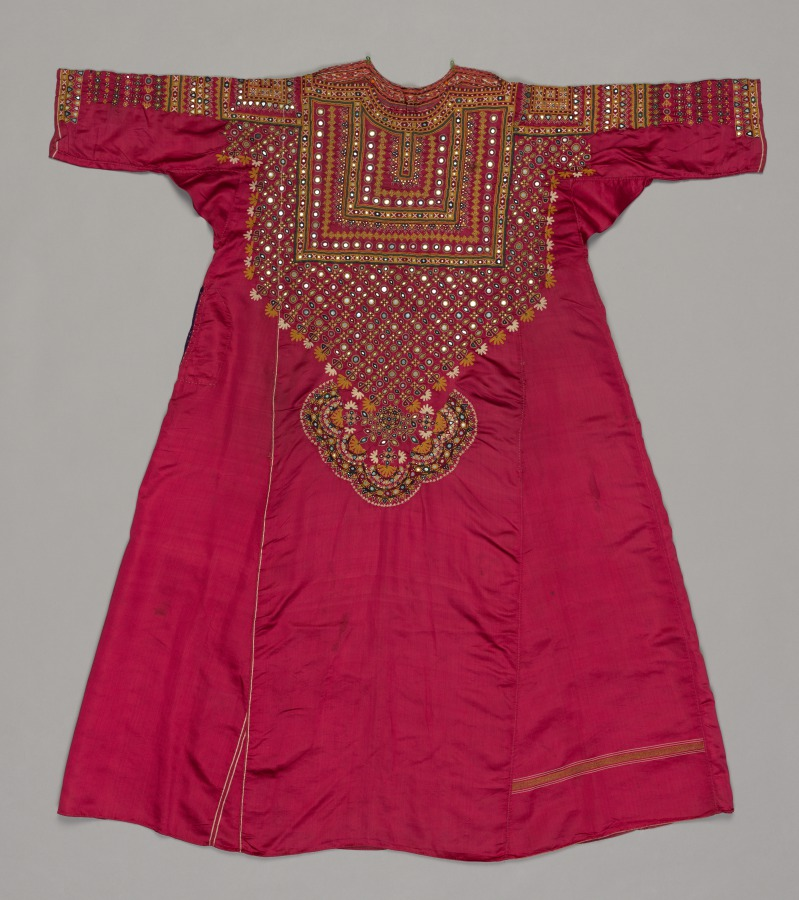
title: "Aba": Woman's Dress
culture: Western India, Gujarat, Kachchh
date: late 1800s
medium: silk on silk satin with mirror-glass inserts, embroidery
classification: Garment